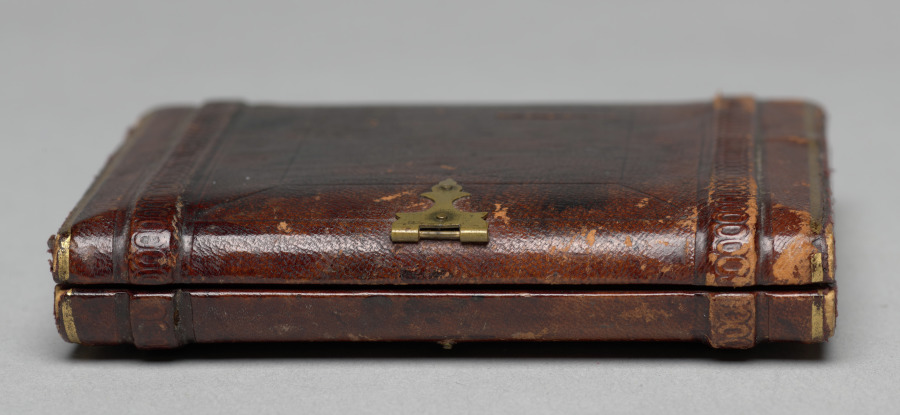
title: Miner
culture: America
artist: Robert H. Vance (American, 1825–1876)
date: c. 1853–55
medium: daguerreotype, sixth plate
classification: Photograph